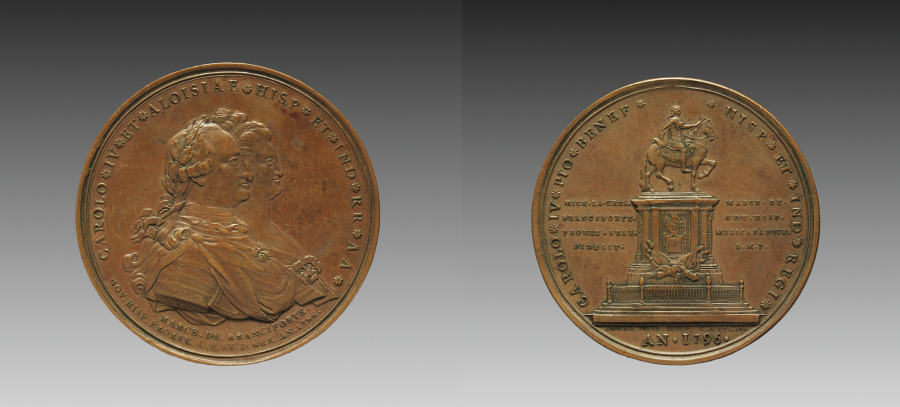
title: Portrait of Charles IV, King of Spain, and María Luisa, Queen Consort of Charles IV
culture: Spain, late 18th century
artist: Manuel Tolsá (Spanish, 1757–1816)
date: 1796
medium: bronze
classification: Sculpture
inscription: "CAROLO IV ET ALOISIA HISP. ET. IND. A.A. MARCE DE FRANCIFORTE. NOV. HISP. PROREX. C.F. ET D. MEX. AN 1796."